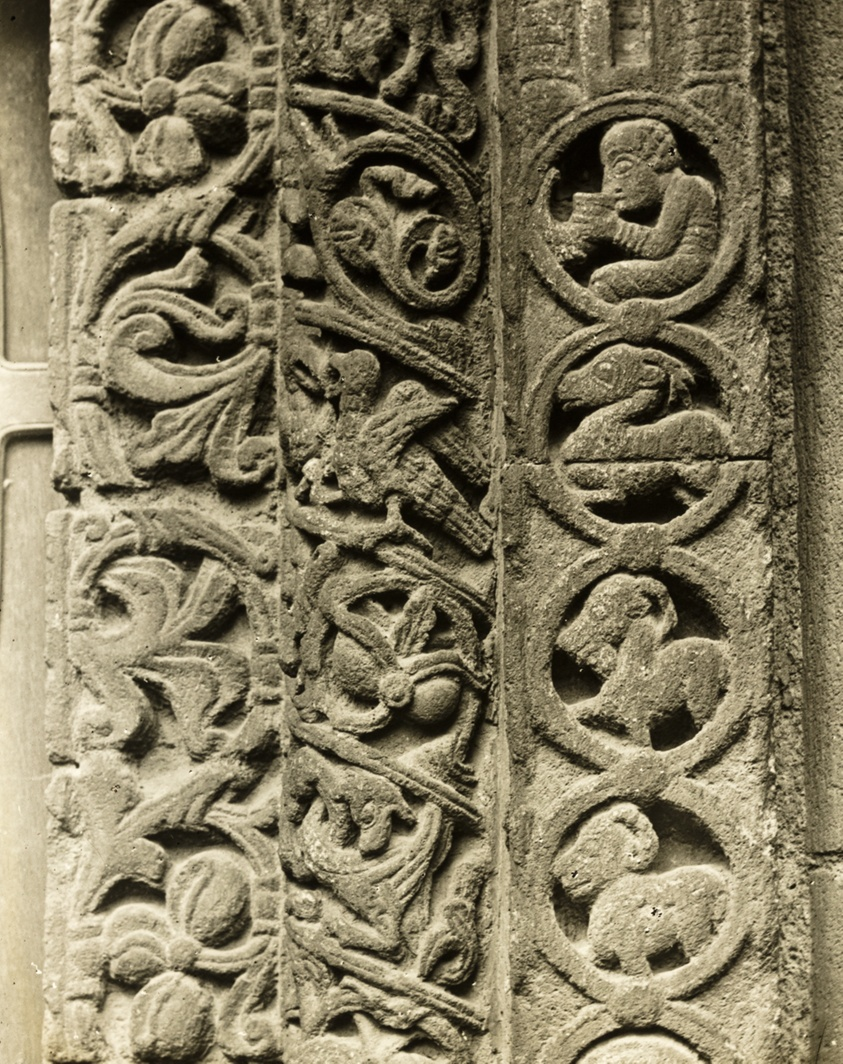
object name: Photograph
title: Ely Cathedral: Prior's Door, Side Details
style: Pictorialism, 19th century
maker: Frederick H. Evans (English, 1853–1943)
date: c. 1891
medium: Lantern slide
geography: England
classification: photograph; photography